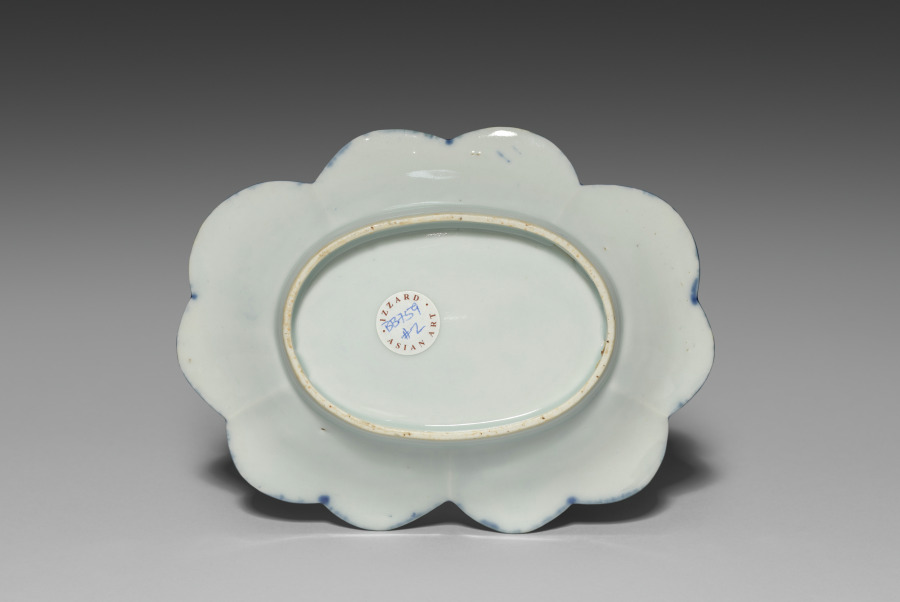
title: Small Dish (Kozara) with Fireworks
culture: Japan, Edo period (1615–1868)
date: mid-1600s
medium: Porcelain with molding and underglaze blue (Hizen ware, Nabeshima type)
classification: Ceramic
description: This dish evokes the popular summer pastime of fireworks displays.